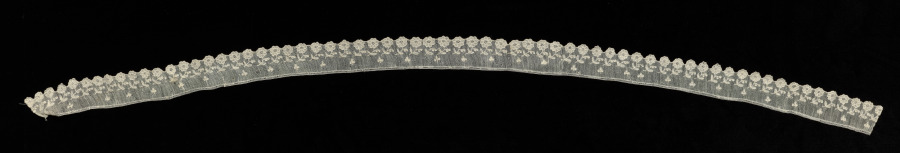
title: Lace Edging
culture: Italy, Burano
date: 1760–99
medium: Linen: needle lace (Burano Point)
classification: Lace